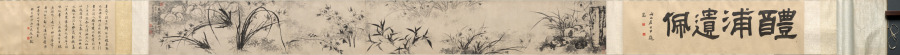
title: Rocks, Orchid, and Bamboo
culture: China, Qing dynasty (1644-1911)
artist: Shitao (Chinese, 1642–1707)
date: 1662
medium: handscroll; ink on paper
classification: Painting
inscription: Title colophon in four characters with signature and two seals on gold-flecked paper.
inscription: Artist's signature, inscription (with date of 1662), five seals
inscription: Colophon with two seals.